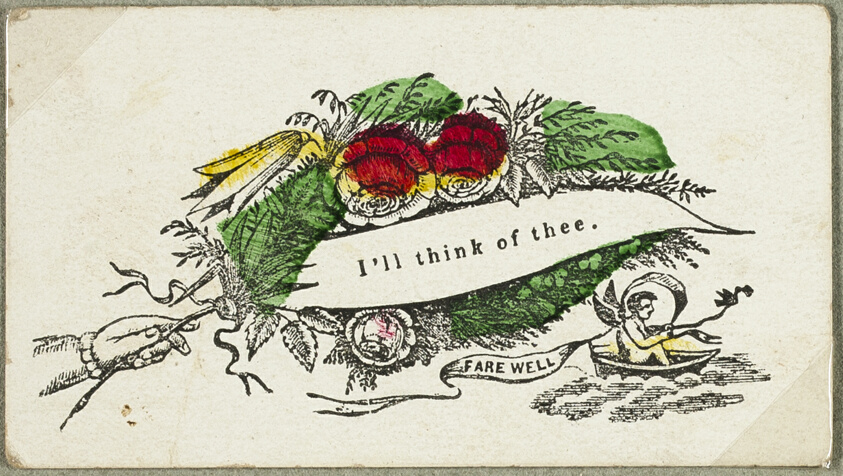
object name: Print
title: I'll Think of Thee (valentine)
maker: Unknown Artist; American or English, 19th century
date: c. 1830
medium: Engraving with hand-coloring on ivory card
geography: United States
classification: valentine; prints and drawing; print